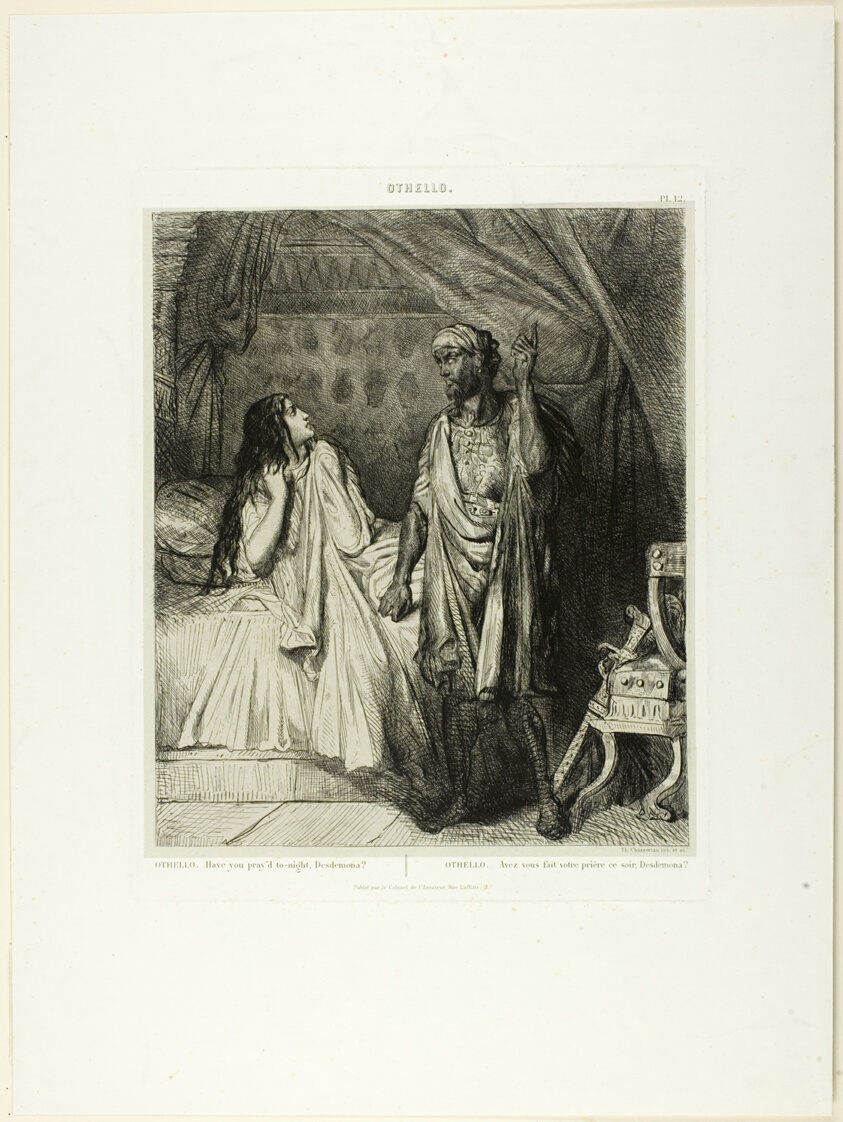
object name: Print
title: Have you pray'd tonight, Desdemona?, plate twelve fom Othello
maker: Théodore Chassériau (French, 1819-1856)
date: 1844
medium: Etching, engraving and roulette on ivory China paper, laid down on white wove paper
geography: France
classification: etching; print; prints and drawing